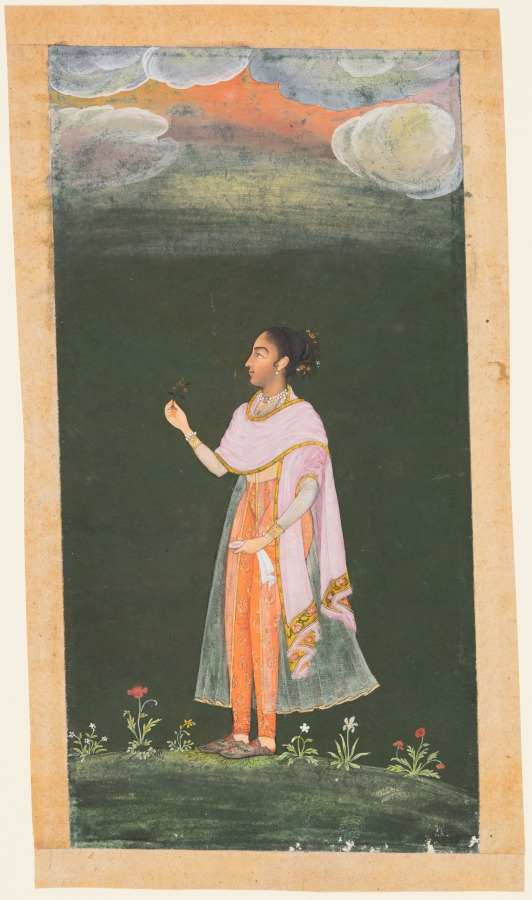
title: Royal Woman Holding a Flower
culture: Northwestern India, Rajasthan, Rajput Kingdom of Bikaner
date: c. 1670s–80s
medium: gum tempera and gold on paper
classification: Painting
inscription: 77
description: Following the model of formal imperial Mughal court portraiture, the artist has lavished care on shading the face of a royal woman and the distinctive qualities of her luxurious textiles. Details have been exquisitely rendered, including the fringe of her pink shawl with its lotus vine border and the sprigs of flowers tucked in her hair.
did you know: The flowering plants on the ground echo the lush vegetation of the Qur'anic paradise.